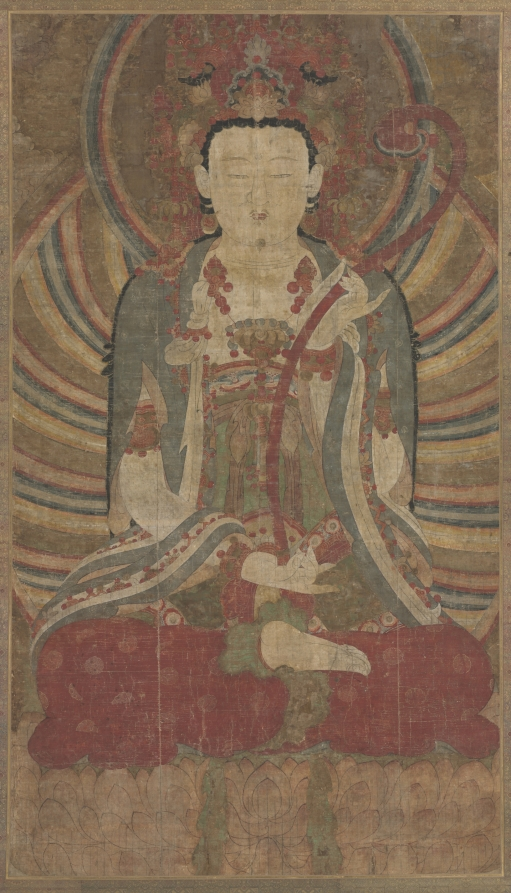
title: Seated Manjusri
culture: Korea, Joseon dynasty (1392–1910)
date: 1700s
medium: hanging scroll; ink and color on silk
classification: Painting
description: Large-size Buddhist paintings dated to the Joseon period (1392–1910) were once hung behind Buddhist statues, attached to the wall. In the Buddhist pantheon of the Joseon period, Bodhisattva Manjusri appears as a deity attendant to Vairocana Buddha.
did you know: Bodhisattva Manjusri is holding a ruyi scepter to represent ultimate wisdom.